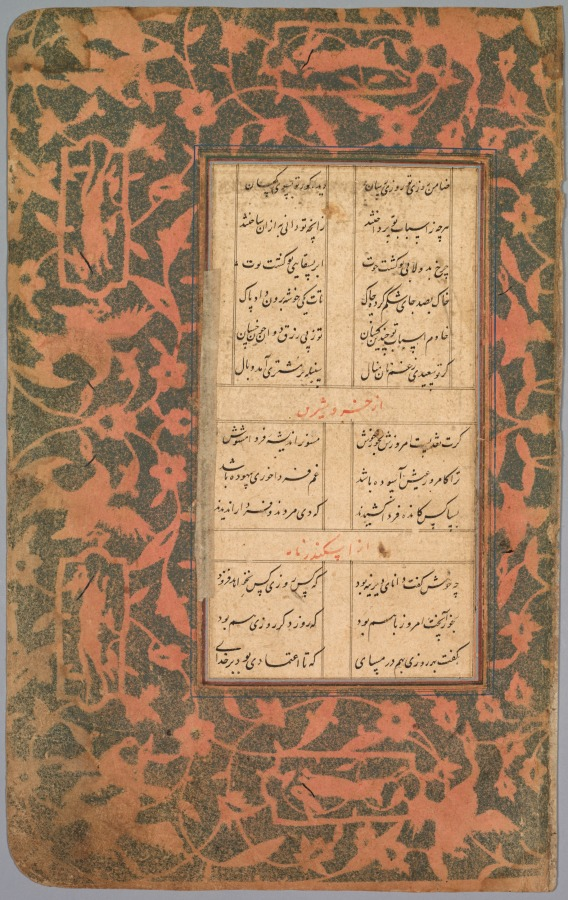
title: School Exercise Alphabet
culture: India, Mughal Dynasty (1526-1756)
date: 18th century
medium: ink on paper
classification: Manuscript